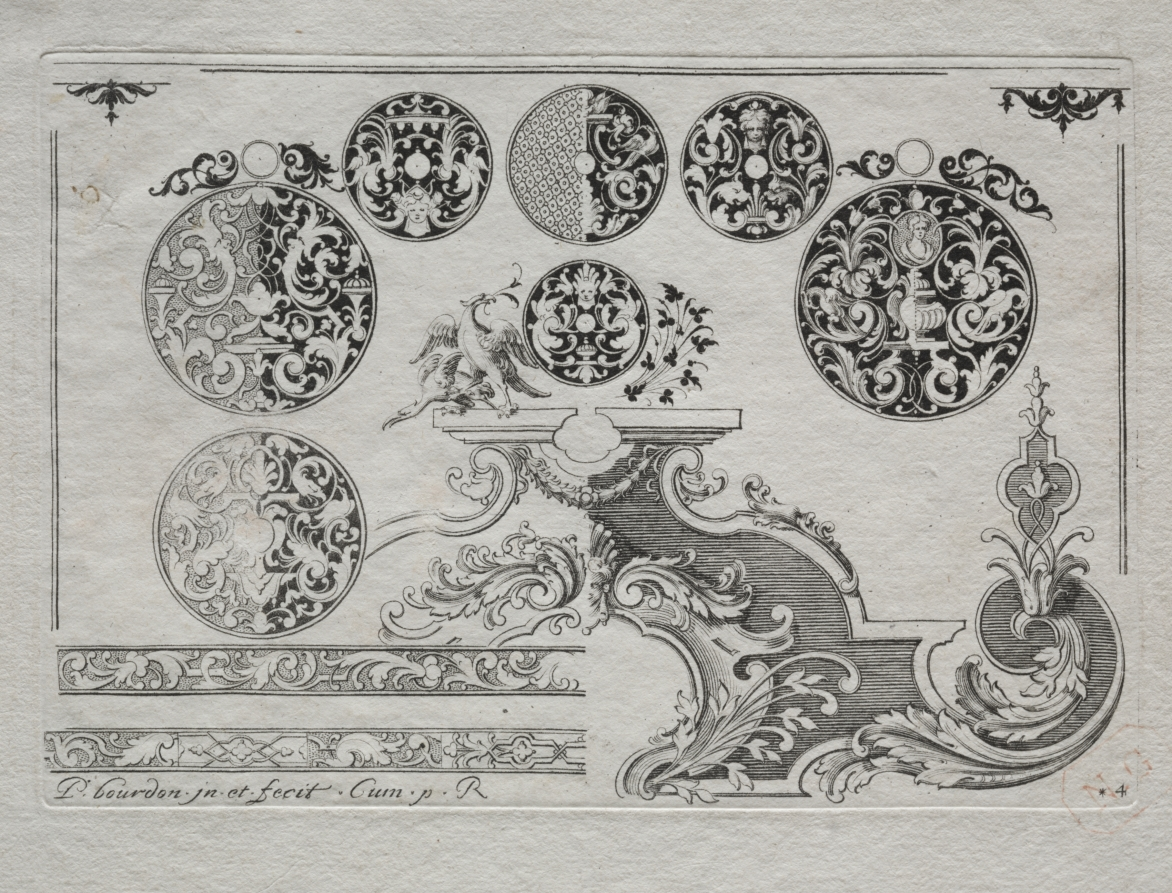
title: # 4 From " Livre sencond essais de gravjre " second book of Engraved designs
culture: France, 18th century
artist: Pierre Bourdon (French)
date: c. 1703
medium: etching and engraving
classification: Print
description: This etching is from a set of prints showcasing decorative patterns by Bourdon. The title page for the set explains that the designs are “useful for clockmakers, goldsmiths, chiselers, engravers and other people.” These craftsmen who made ornamented objects sometimes consulted printed designs for inspiration. However, pattern prints similar to Bourdon’s also catered to aristocrats and wealthy professionals who pursued knowledge about artists and current styles.